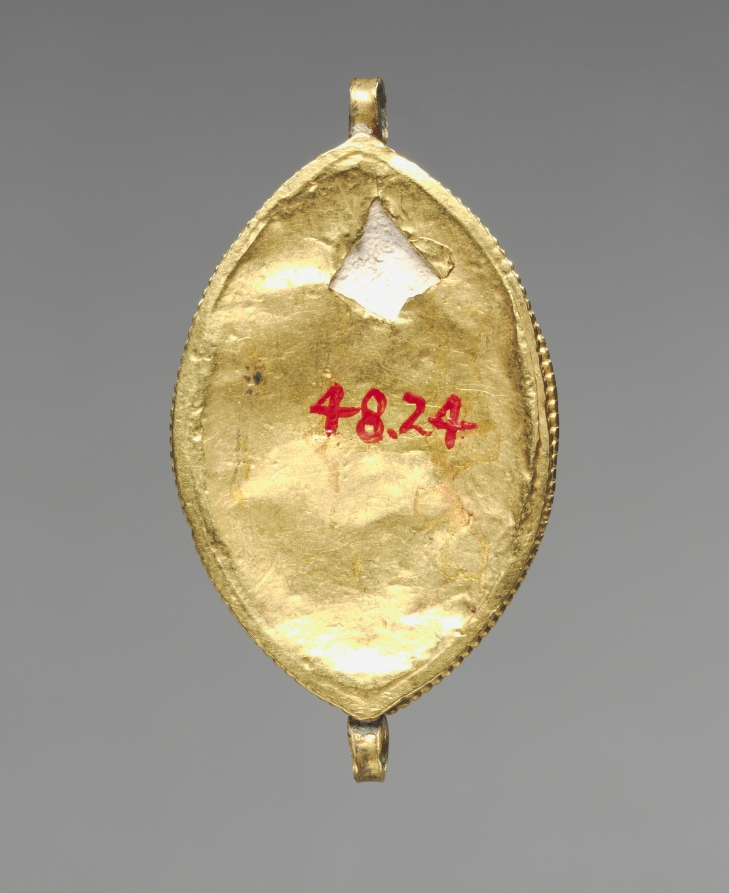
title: Almond-Shaped Pendant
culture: Byzantium, early Byzantine period, 5th-7th Century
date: 400–600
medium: gold, lapis lazuli, garnet, and glass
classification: Jewelry